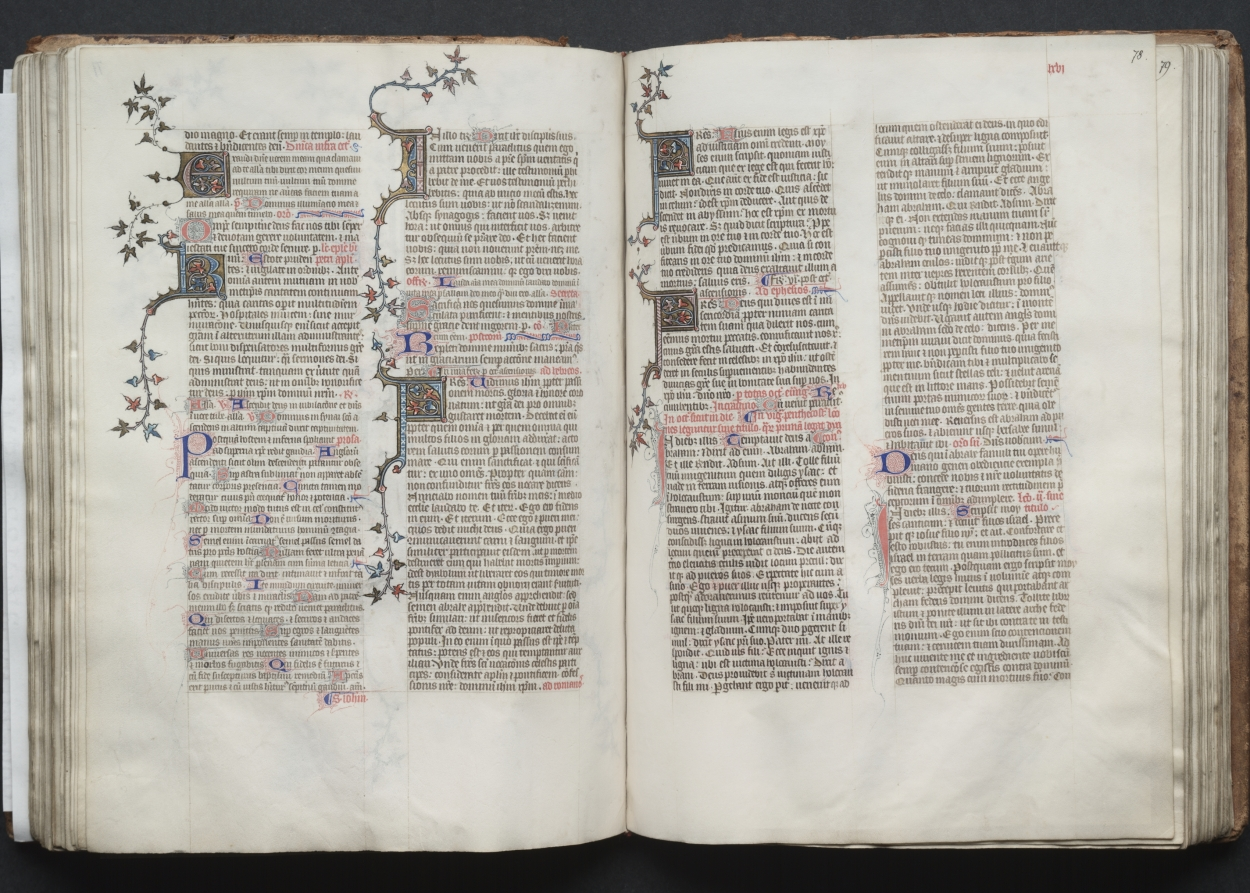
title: The Gotha Missal: Fol. 77v, Text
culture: France, Paris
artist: Master of the Boqueteaux (French)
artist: and Workshop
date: c. 1375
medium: ink, tempera, and gold on vellum; blind-tooled leather binding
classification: Bound Volume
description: The style and quality of this manuscript's decoration is typical of deluxe Parisian books made for aristocratic or royal patrons. Most of the book's decoration appears to be the work of the Master of the Boqueteaux, an artist active at the court of King Charles V (died 1380). His style was apparently shared by a number of book illuminators working in and around Paris. It is very possible that the Gotha Missal belonged to Charles V, but is not provable because the manuscript has no royal portraits and lacks a colophon. Given the book's magnificent decoration, however, it would seem that it was produced for a Valois prince, if not for the king himself. The manuscript receives its name from the German dukes of Gotha, its later owners.